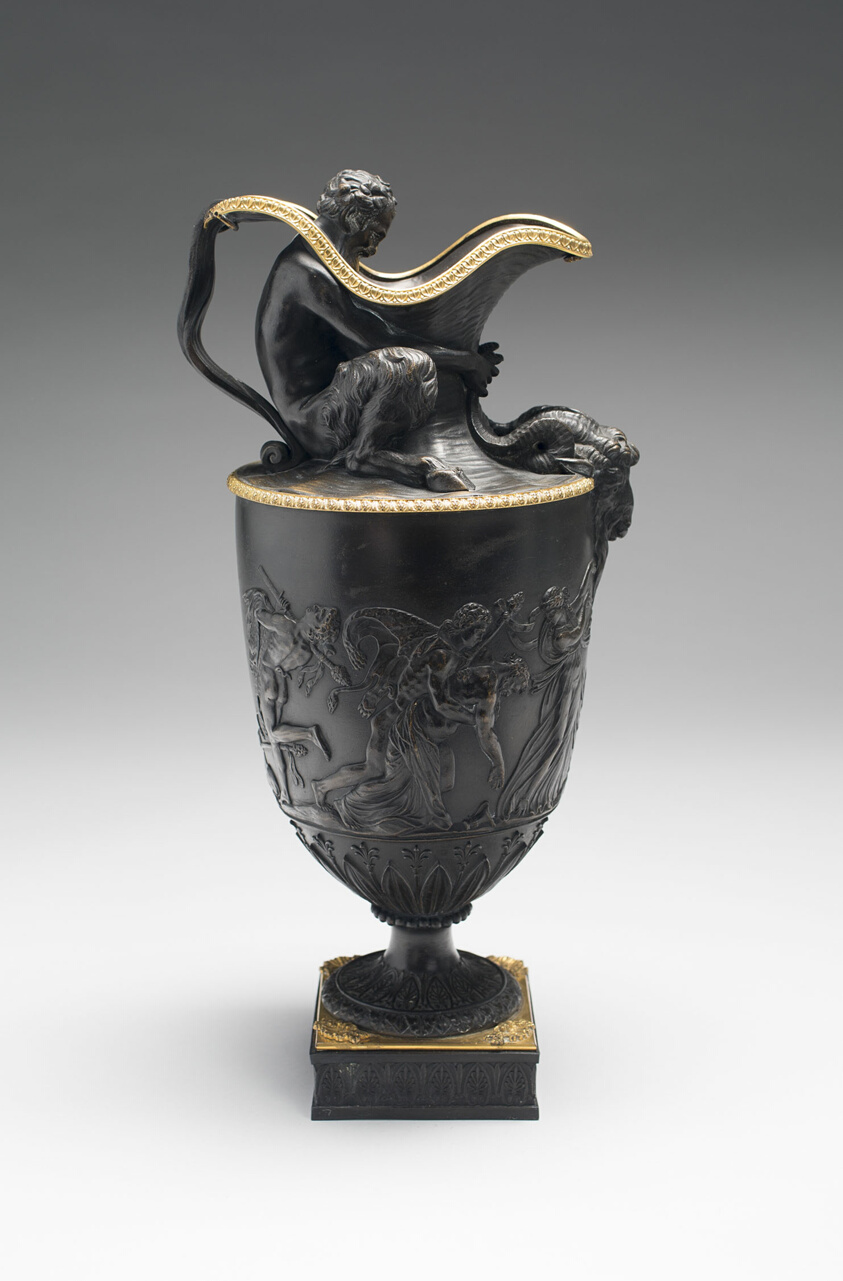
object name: Ceramics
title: Wine Ewer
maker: Wedgwood Manufactory; England, founded 1759; Etruria, Staffordshire, England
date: 1780–85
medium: Stoneware (basaltware)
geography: Burslem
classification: ewer (vessel); vessel; tableware; stoneware; european decorative arts; ceramics